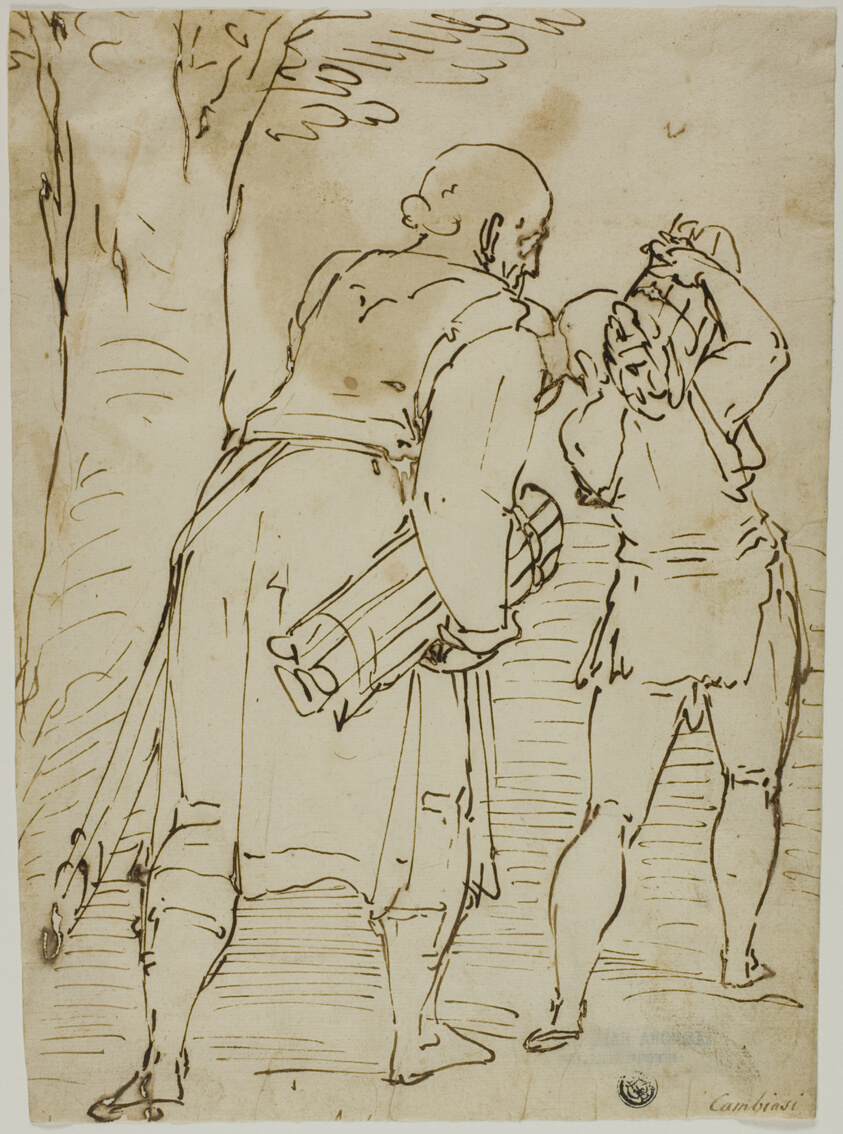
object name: Drawing and Watercolor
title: Abraham and Isaac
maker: Attributed to Luca Cambiaso; Italian, 1527-1585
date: c. 1570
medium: Pen and iron gall ink on ivory laid paper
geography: Italy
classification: pen and ink drawings; drawings (visual works); prints and drawing